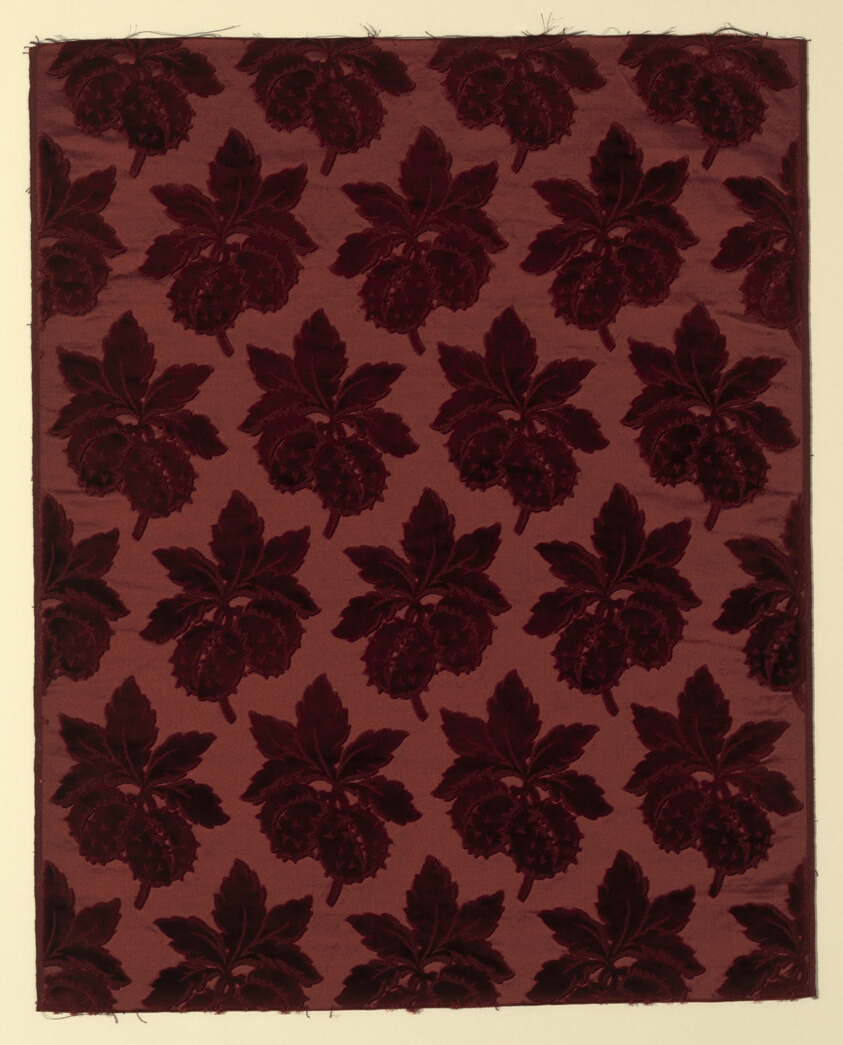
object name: Textile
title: Panel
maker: England or France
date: c. 1860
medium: Silk, warp-float faced 7:1 satin weave with supplementary pile warps forming cut and uncut, voided velvet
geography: England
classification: textile; weaving - velvet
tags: flowers